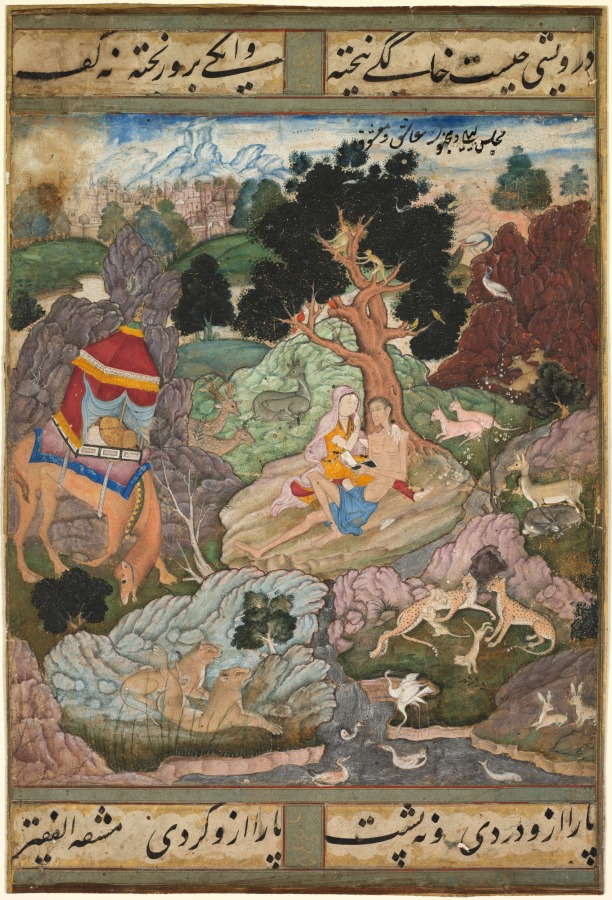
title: Layla and Majnun in the wilderness with animals, from a Khamsa (Quintet) of Amir Khusrau Dihlavi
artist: attributed to Sanwalah (Indian, active c. 1580–1600)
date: c. 1590–1600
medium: Gum tempera, ink, and gold on paper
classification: Painting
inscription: Calligraphy of Persian sayings from the aphoristic meditations of Khwaja Abd-Allah Ansari (Persian, 1006–1089) in top and bottom borders, in nasta‘liq script: What is “dervishness”? It is a little lump of fine purified soil with a sprinkling of a few drops of water: neither is the sole of the foot irritated by it, nor does the heel of the foot collect dust from it. The work of the lowly . . .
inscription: Persian inscription at top right, in nasta‘liq script: the meeting of Layla and Majnun, lover and beloved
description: Nestled in the multicolored rocks are the reunited lovers Layla and Majnun, forced by society to remain separated for years. Majnun’s name means “madman,” since the separation drove him past the brink of sanity. Exiling himself to the wilderness, he became emaciated. When Layla found him after a prophetic dream, the wild animals gathered around, drawn to the purity and depth of their love. This painting illustrates a version of the story as told by an Indian author who wrote in Persian. He altered the ending given by previous Persian authors to the ancient Bedouin tale that originated among nomadic tribes of the Arabian Peninsula, in which Layla dies before the couple can be physically reunited.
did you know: White paint, prone to flaking, chipped off her face, revealing the underdrawing.